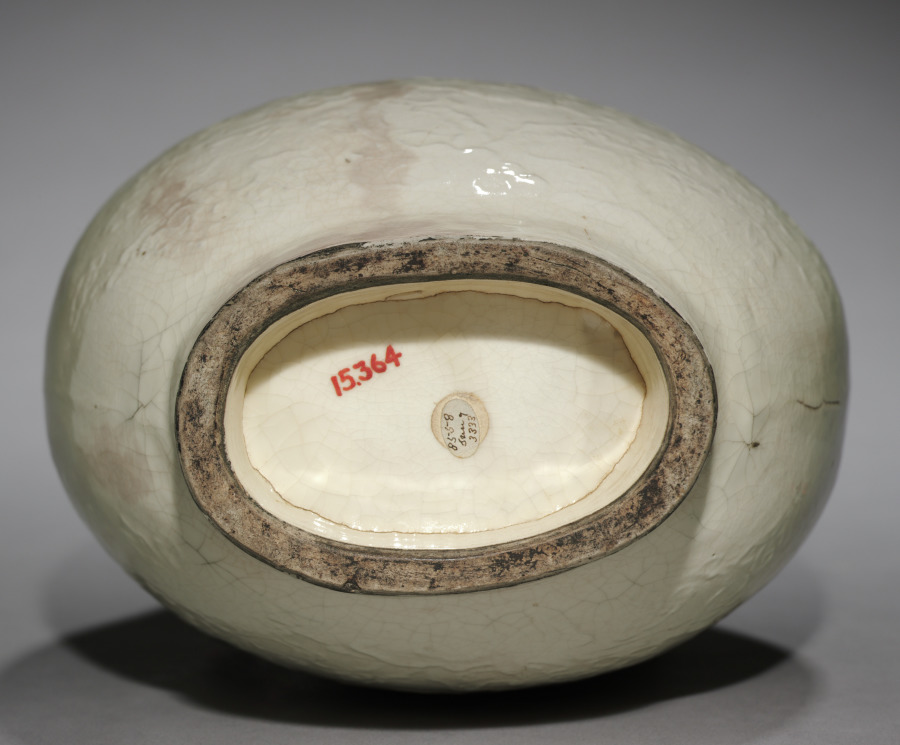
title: Vase: Ding ware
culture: China, Ming dynasty (1368–1644)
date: 1368–1644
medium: porcelain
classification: Ceramic